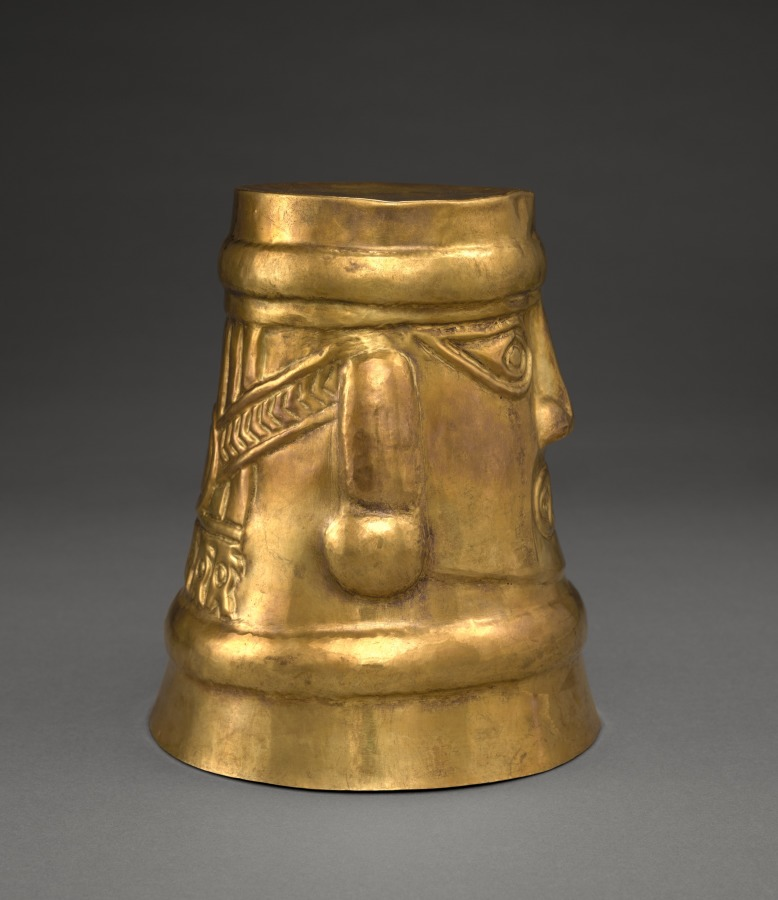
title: Head Beaker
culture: Central Andes (Peru), Lambayeque (Sicán) people, 10th century-12th century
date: 900–1100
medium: gold, hammered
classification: Metalwork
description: Metalworking flourished among the Lambayeque people of Peru’s north coast. Artists made large objects, including containers, in unprecedented numbers; one Lambayeque tomb contained nearly 200 gold or silver beakers. The head on this beaker has been interpreted as the visage of either the culture’s principal deity—its divinity signaled by its feline-like fangs—or the deified founder of the Lambayeque ruling dynasty. It is not known why the head is upright only when the beaker rests on its rim.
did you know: This drinking vessel holds close to 62 oz of fluid—almost half a gallon!